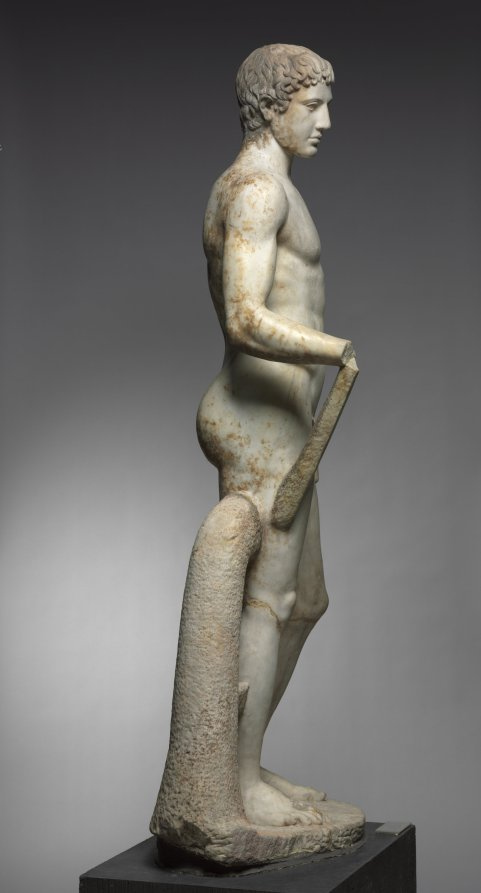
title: Statue of an Athlete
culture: Italy, Roman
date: 1–100 CE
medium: marble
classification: Sculpture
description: This idealized athlete recalls Greek sculptural types invented and popularized during the 400s BC. Large-scale athletes and other sculptures like this were originally created by famous artists as sanctuary dedications. Centuries later, they were widely copied and adapted by Roman sculptors, whose clients sought their own versions of earlier masterpieces. Working in marble rather than bronze, these sculptors added certain elements for stability, such as the struts and the large tree trunk beside the right leg here. Sculptures like this one are profoundly complex, made by and for Romans but descended from Greek ancestors.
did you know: For many years, this sculpture stood in the rotunda of the Cleveland Museum of Art.